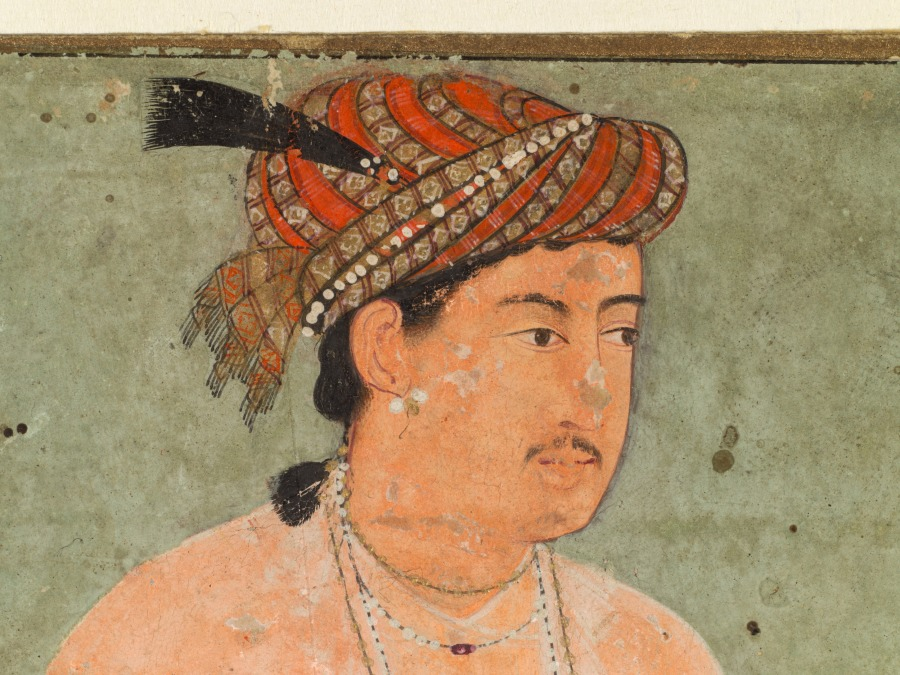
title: A Mughal Prince, Perhaps Danyal, Holding a Sprig of Flowers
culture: Mughal India, court of Akbar (reigned 1556–1605)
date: c. 1580–90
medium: Gum tempera and gold on paper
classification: Painting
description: Prince Danyal (1527–1605), the emperor Akbar’s youngest son, is said to have been his favorite. Danyal served his father as a military officer, leading contingents to the Deccan plateau in southern India, until he succumbed to an untimely death of alcoholism; Akbar himself died later that year. Here, Danyal wears the thumb ring of an archer and grasps a white flower in his hand, recalling his epithet, Nosegay of Fortune’s Spring. In his right hand he holds prayer beads. A sword, knife, and dagger hang from his sash. This early Mughal portrait depicts him as he appeared in his mid-teens.